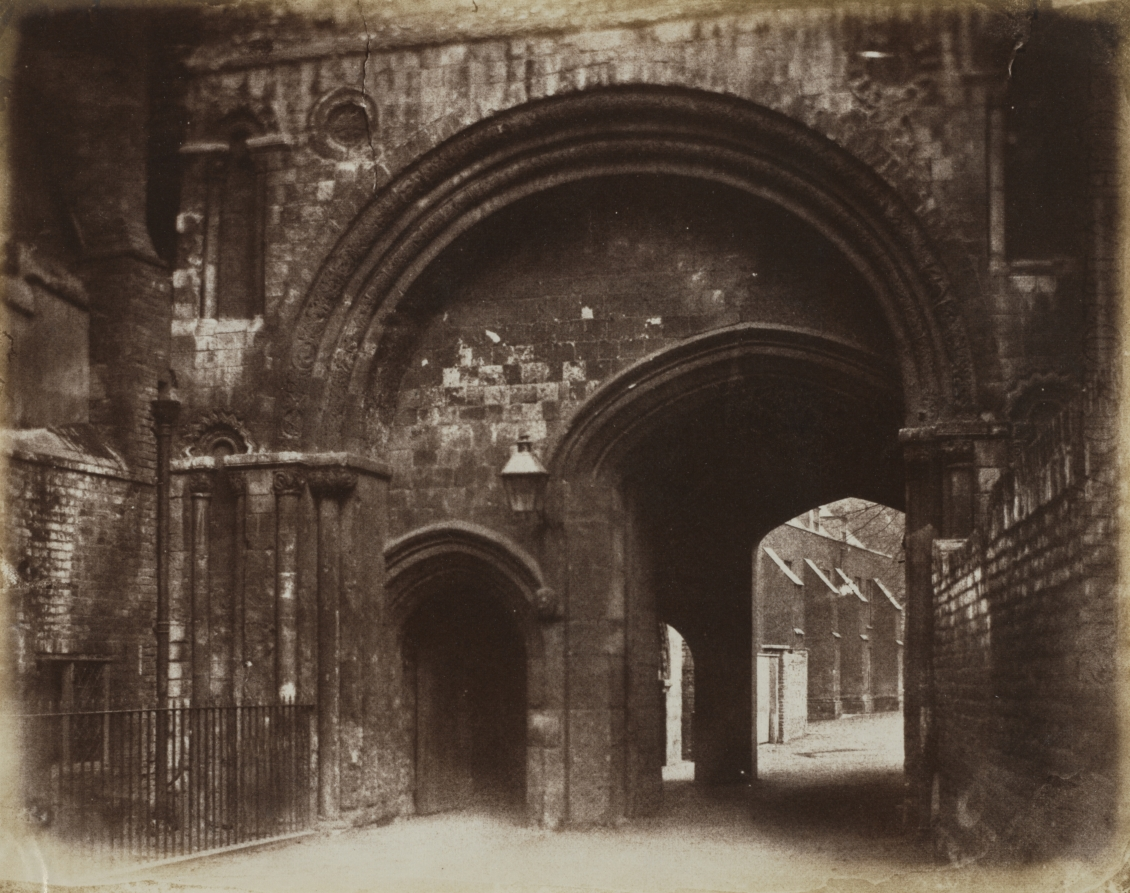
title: Canterbury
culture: England, 19th century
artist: Robert Henry Cheney (British, 1800–1866)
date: c. 1853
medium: albumen print from calotype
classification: Photograph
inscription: Written in ink on recto of mount: "Canterbury"